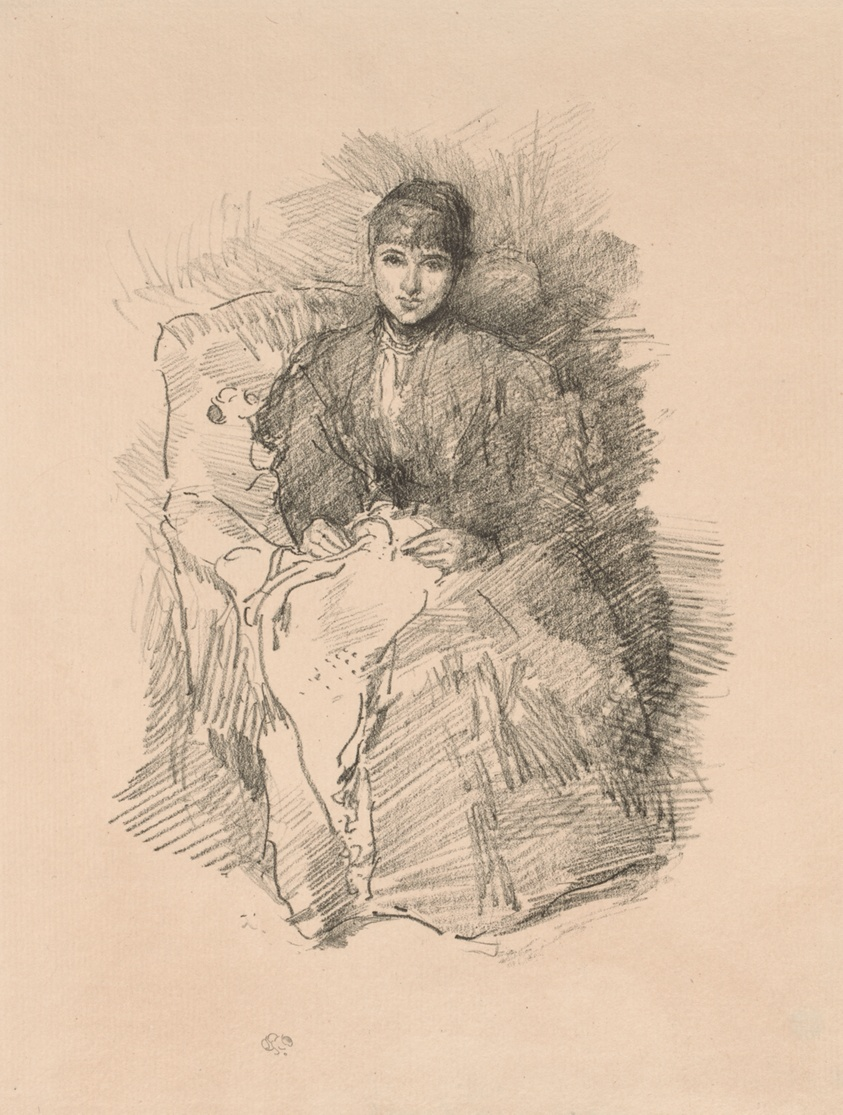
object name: Print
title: Needlework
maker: James McNeill Whistler (American, 1834-1903)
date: 1896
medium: Transfer lithograph in black on cream laid paper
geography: United States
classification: transfer lithograph; lithograph; print; prints and drawing; paper